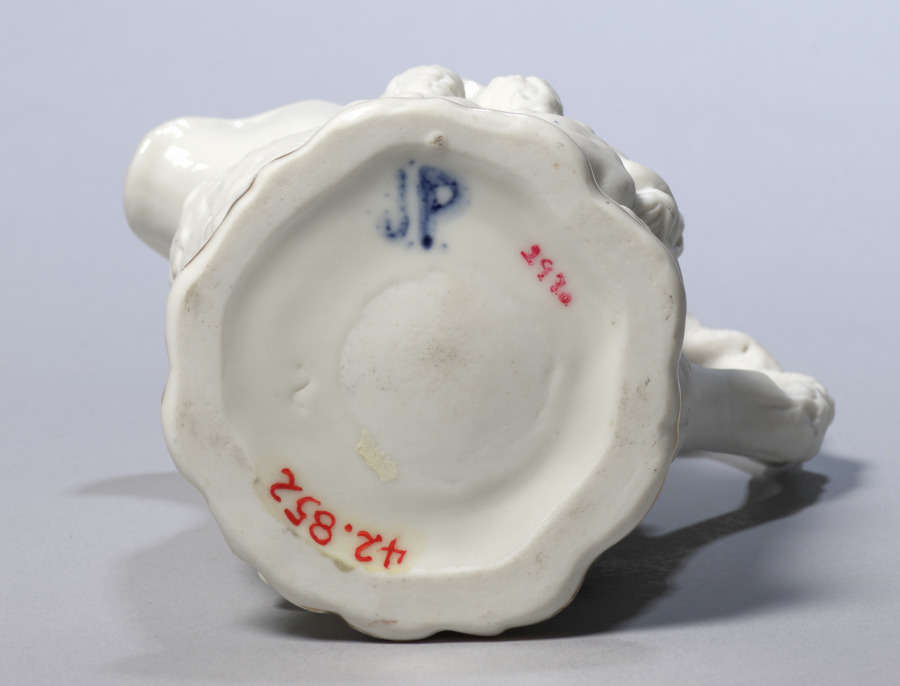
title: Jug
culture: France, 19th century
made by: Jacob Petit (French)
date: 1800s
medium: ceramic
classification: Ceramic